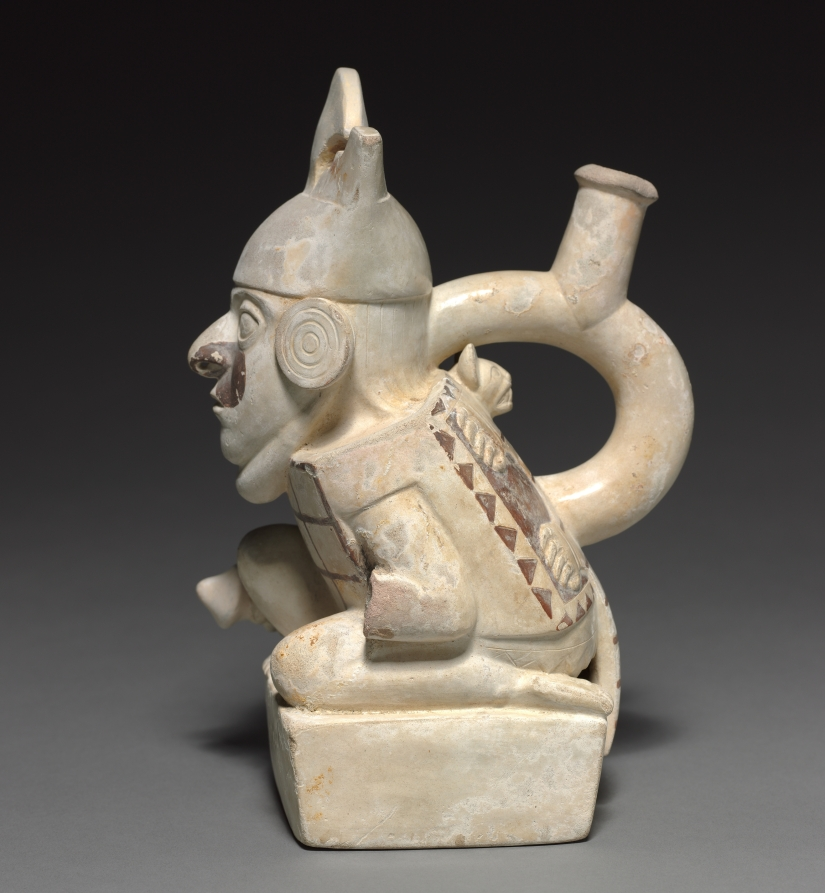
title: Warrior Vessel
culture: Peru, North Coast, Moche, Moche style (50-800)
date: c. 50–200 CE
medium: earthenware with colored slips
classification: Ceramic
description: This vessel's exquisite, crisp detail rewards careful viewing. The modeling of the feline pelt on the back is especially delicate and sharp, and each of the squares on the tunic carries a tiny dot in the upper corners, as though the squares represent plates of metal or shell attached to fabric. The face is decorated with paint or tattooing, and the headdress supports a curved, blade-shaped form.